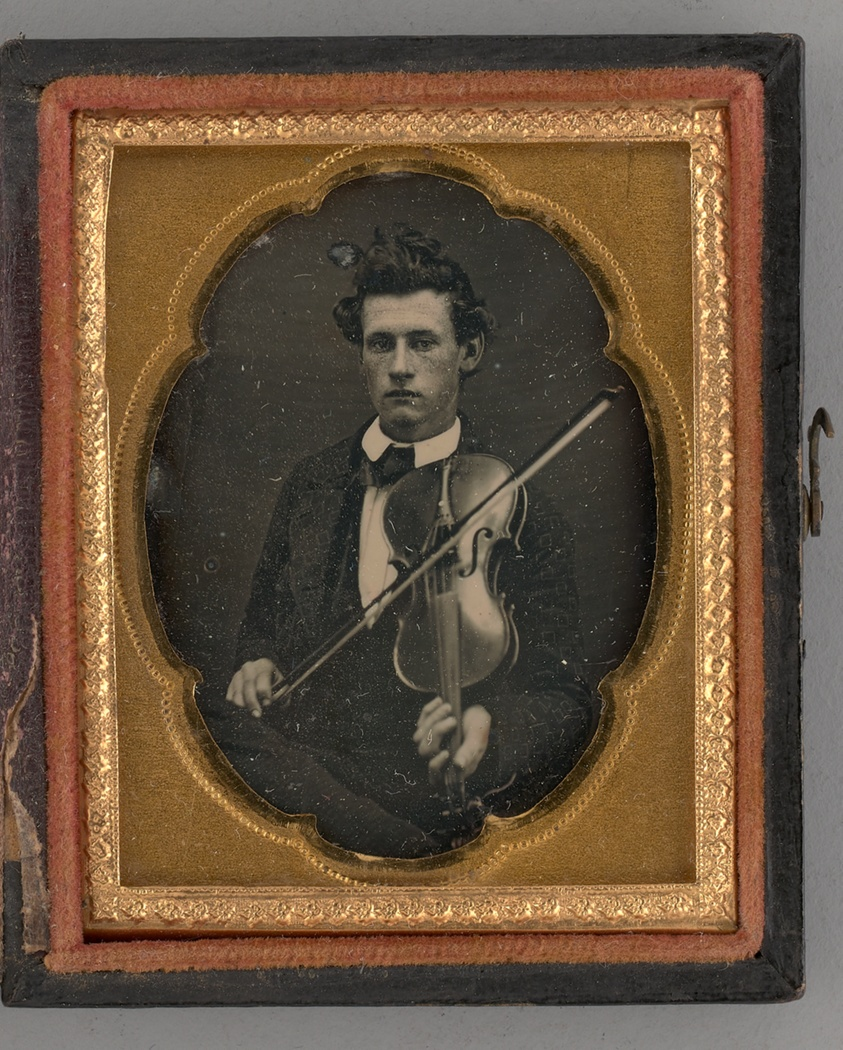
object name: Photograph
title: Untitled (Portrait of a Man Holding a Violin)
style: 19th century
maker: Unknown maker; American, 19th century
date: 1858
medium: Daguerreotype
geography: United States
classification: portrait; photography; photographic process; photograph; daguerreotype; portrait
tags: lundberg collection, Male, violins, men, portrait, portraits, portraits: male subject